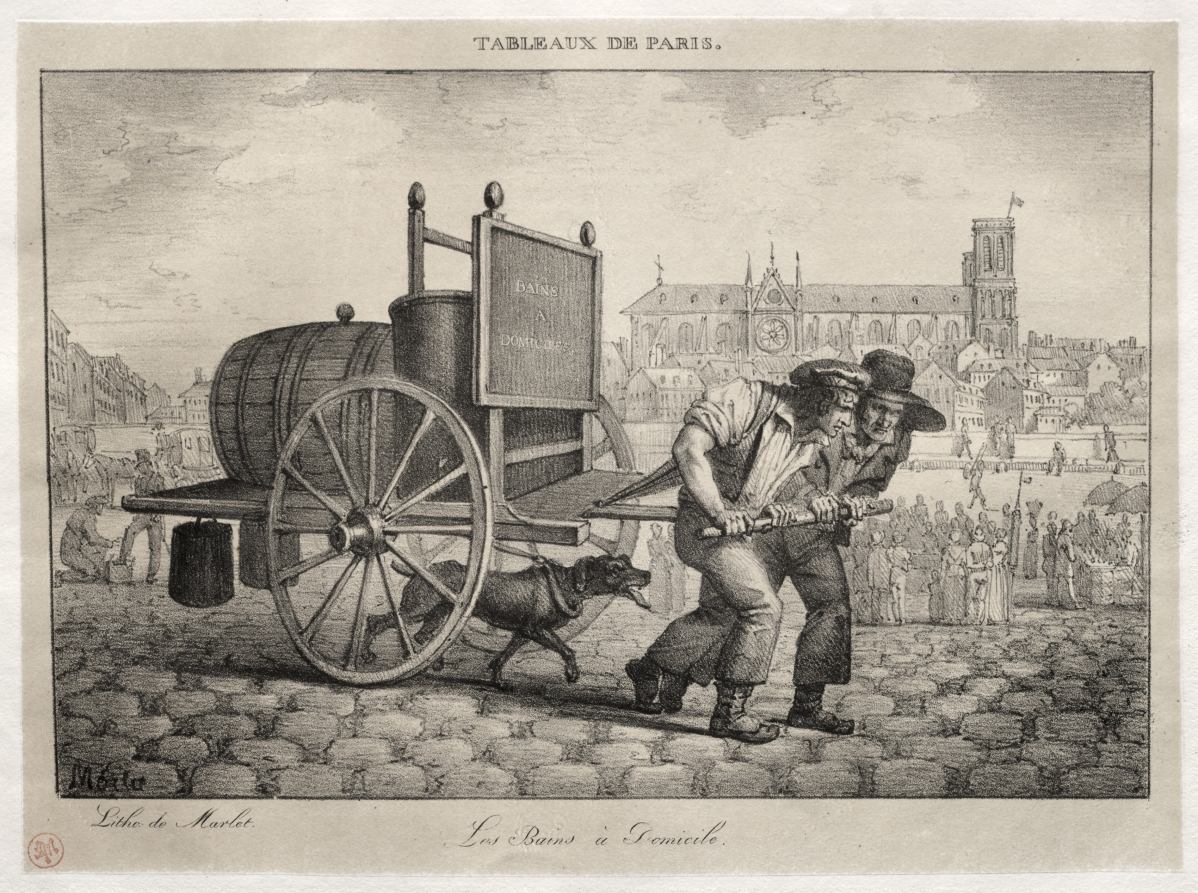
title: Baths at Home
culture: France, 19th century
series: Scenes of Paris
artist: Jean Henri Marlet (French, 1770–1847)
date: 1820s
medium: lithograph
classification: Print